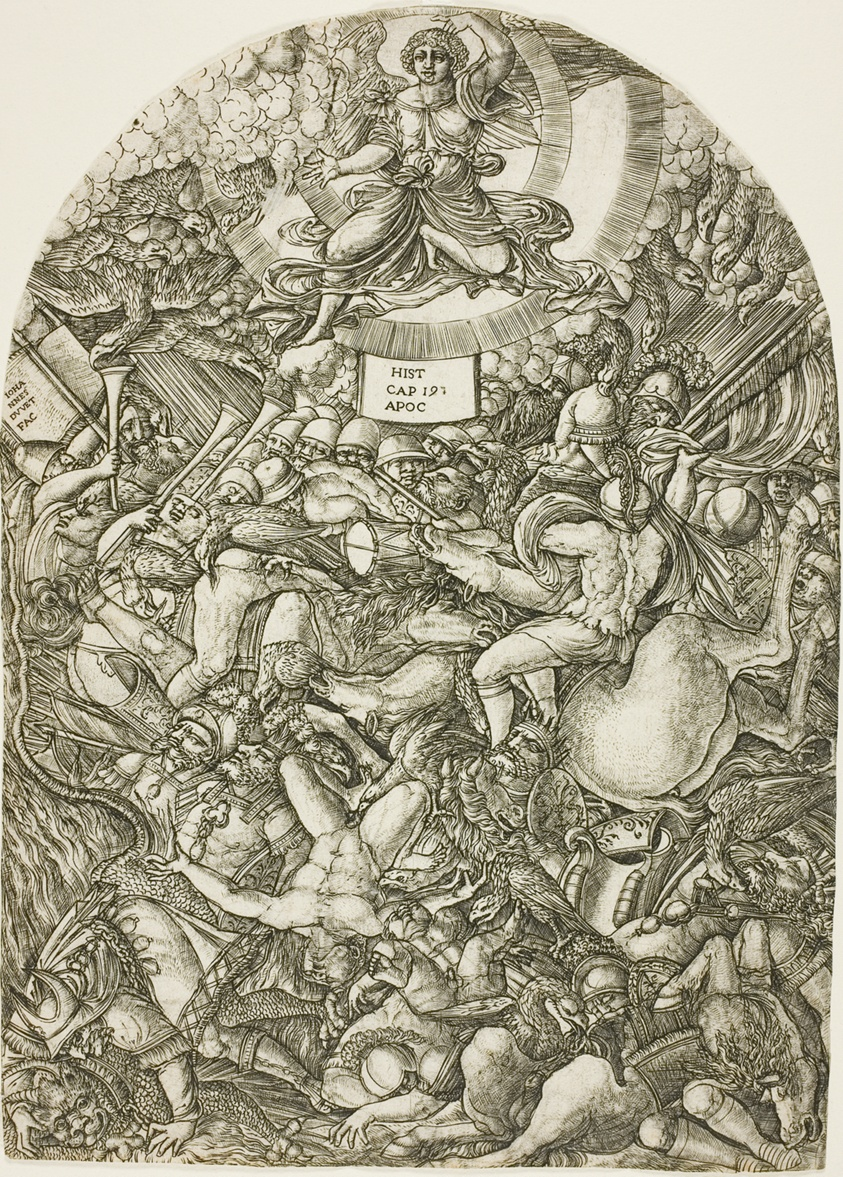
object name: Print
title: The Angel Calling the Birds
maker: Jean Duvet (French, 1485-after 1561)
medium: Engraving in black on ivory laid paper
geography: France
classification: engraving; print; prints and drawing